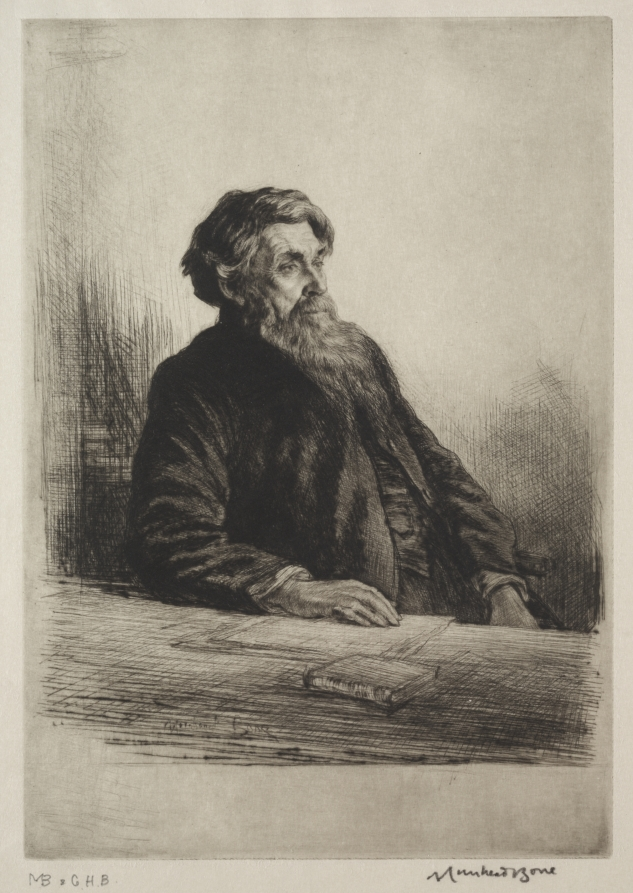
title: Dr. James, President of St. John's College, Oxford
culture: England, 20th century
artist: Muirhead Bone (British, 1876–1953)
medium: drypoint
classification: Print